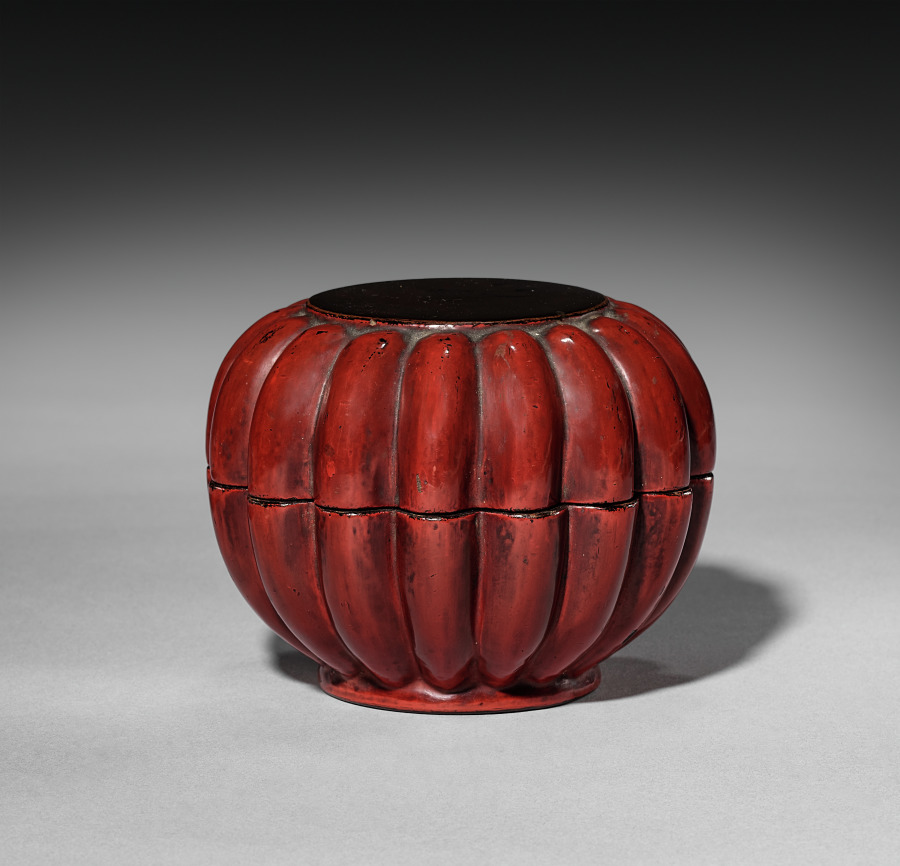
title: Tea Caddy (Chaire)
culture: Japan, Muromachi period (1392–1573)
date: 1500s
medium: Negoro lacquer on wood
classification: Lacquer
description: Negoro is a lacquer technique, named after the Negoro temple in Japan, in which several layers of red lacquer are applied over a black lacquer undercoating. Through years of handling, a natural surface of red and black random patterns emerges, an aesthetic highly prized by the Japanese.